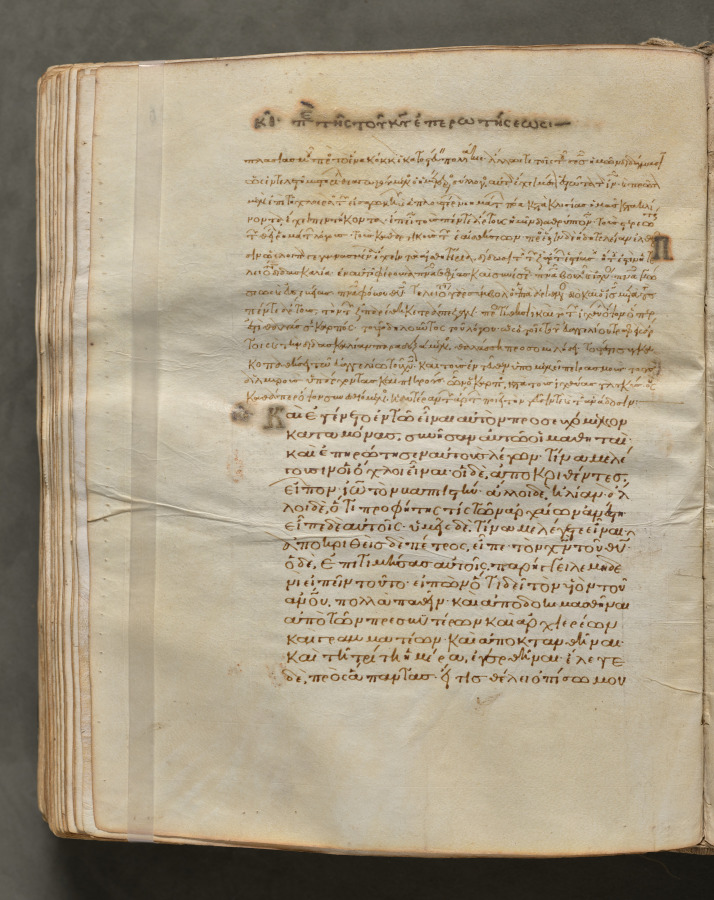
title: Text, folio 246 (verso), from a Gospel Book with Commentaries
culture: Byzantium, Constantinople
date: c. 1000–1100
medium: ink, tempera, and gold on vellum; leather binding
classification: Bound Volume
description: Each of the four gospels in this book opens on a page with brilliantly illuminated borders depicting the author of the text as well as birds—principally peacocks, symbols of the immortality of the soul—and fountains, representing the fountain of life and the salvation of the soul. This volume consists of 428 leaves with texts in Greek. Its level of sophistication suggests that it was probably written and decorated in a monastery in Constantinople.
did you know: Gospel books were carried in procession through Byzantine churches.